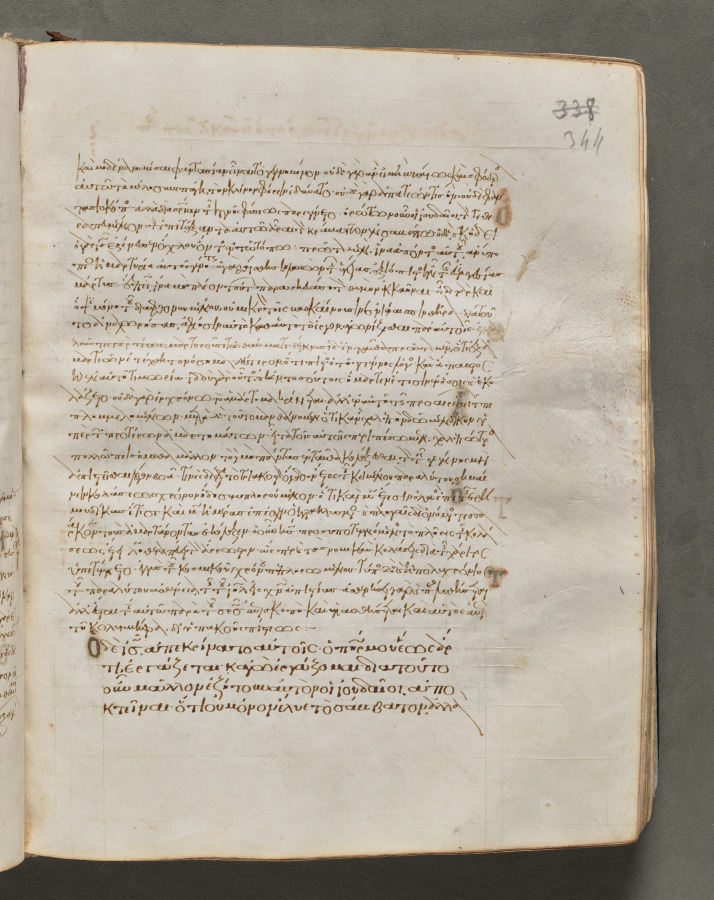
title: Text, folio 344 (recto), from a Gospel Book with Commentaries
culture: Byzantium, Constantinople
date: c. 1000–1100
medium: ink, tempera, and gold on vellum; leather binding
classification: Bound Volume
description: Each of the four gospels in this book opens on a page with brilliantly illuminated borders depicting the author of the text as well as birds—principally peacocks, symbols of the immortality of the soul—and fountains, representing the fountain of life and the salvation of the soul. This volume consists of 428 leaves with texts in Greek. Its level of sophistication suggests that it was probably written and decorated in a monastery in Constantinople.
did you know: Gospel books were carried in procession through Byzantine churches.